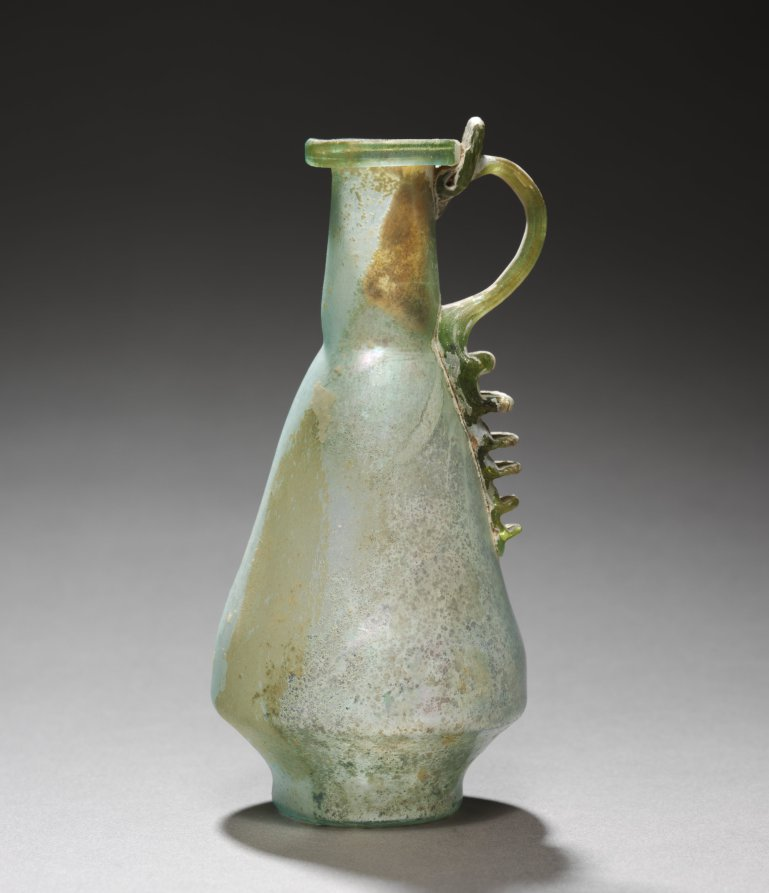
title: Jug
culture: Cyprus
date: 100–300 CE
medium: glass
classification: Glass